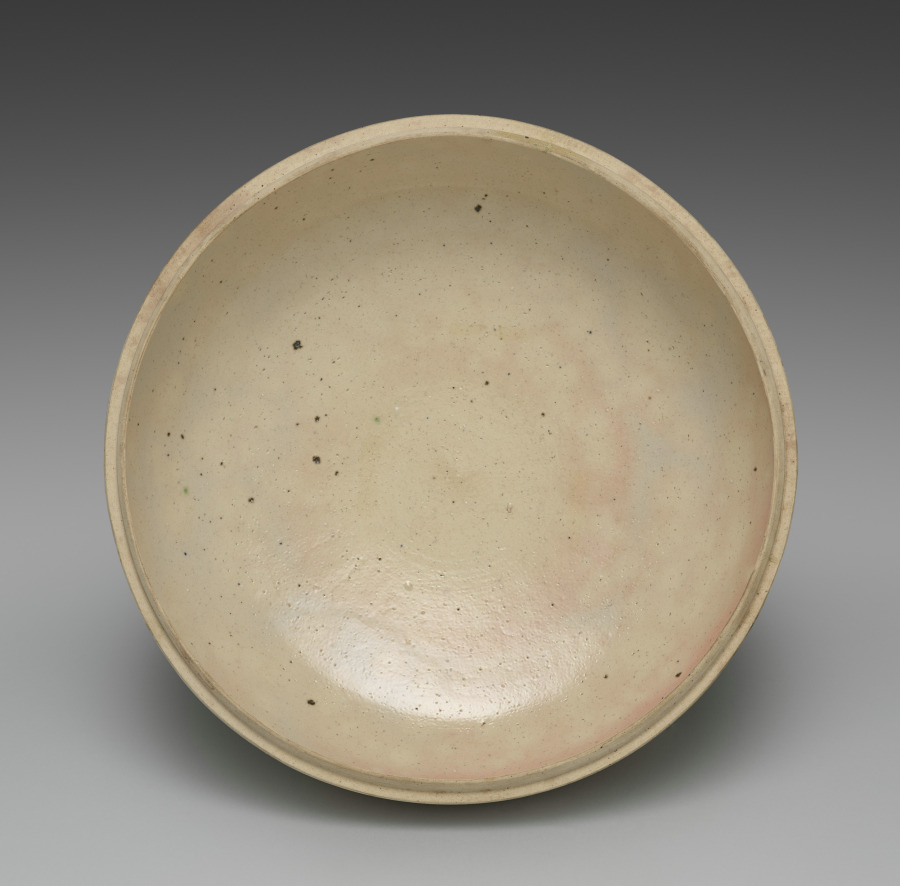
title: Bowl with Seven Treasures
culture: Japan, Edo period (1615–1868)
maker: Seifū Yohei II (Japanese, 1844–1878)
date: 1861–78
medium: Stoneware with overglaze color enamel and gold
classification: Ceramic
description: While porcelain was their primary specialization, all the members of the Seifū studio also made stoneware painted with iron oxide designs under the glaze and with color enamel and gold over the glaze. Many examples are further characterized by pink dots brought out during firing and by crackling in the glaze. Works of this type are classified as Kyoto ware, after the city where the style developed. People used the ceramics for a diversity of purposes, from everyday dining to chanoyu, or Japanese tea practice.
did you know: Overglaze enamels in red, green, and white sit within lattices of jewel-shaped gold forms scattered across the lid and base in a design known as the seven treasures.